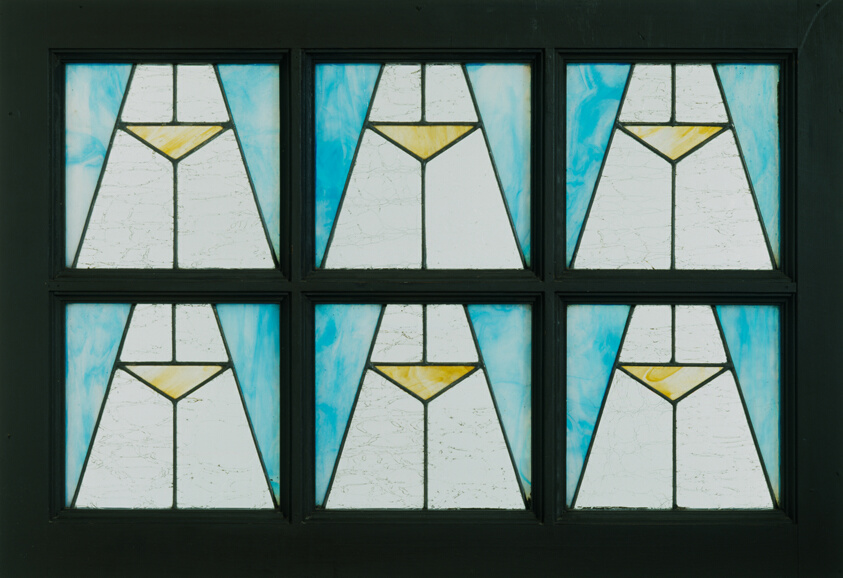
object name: Architectural fragment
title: Ravinia Park Casino Building: Window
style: Prairie School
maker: Peter Joseph Weber (American, born Germany, 1864-1923)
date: 1904 (building demolished in 1986)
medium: Six panels of clear and colored textured glass in oak sash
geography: United States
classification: stained glass/leaded glass; architectural fragment; architecture